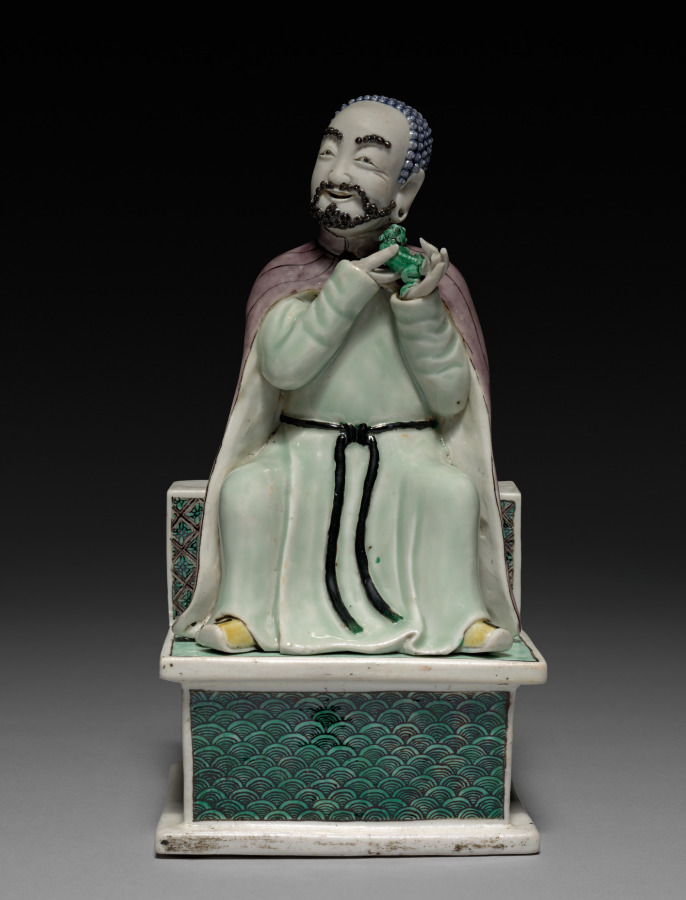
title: Lohan (Arhat) Holding a Fu Dog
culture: China, Jiangxi province, Jingdezhen kilns, Qing dynasty (1644-1911), Kangxi reign (1662-1722)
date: 1662–1722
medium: porcelain with famille verte overglaze enamel decoration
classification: Ceramic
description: Lohan are disciples of Buddha with supernatural powers and eccentric behaviors. This lohan is holding the fu-dog, symbolizing good luck, while its mate is holding the peach of longevity (shoutao). With carefree smiles and playful gestures, these two figures embody a humorous attitude and a detachment from worldly affairs. This pair of porcelain figures was perhaps part of a house altar set or a decorative item in a household.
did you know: This lohan and its pair embody a humorous attitude and playful behavior, indifference to danger and miracles, and hence a detachment from worldly affairs.